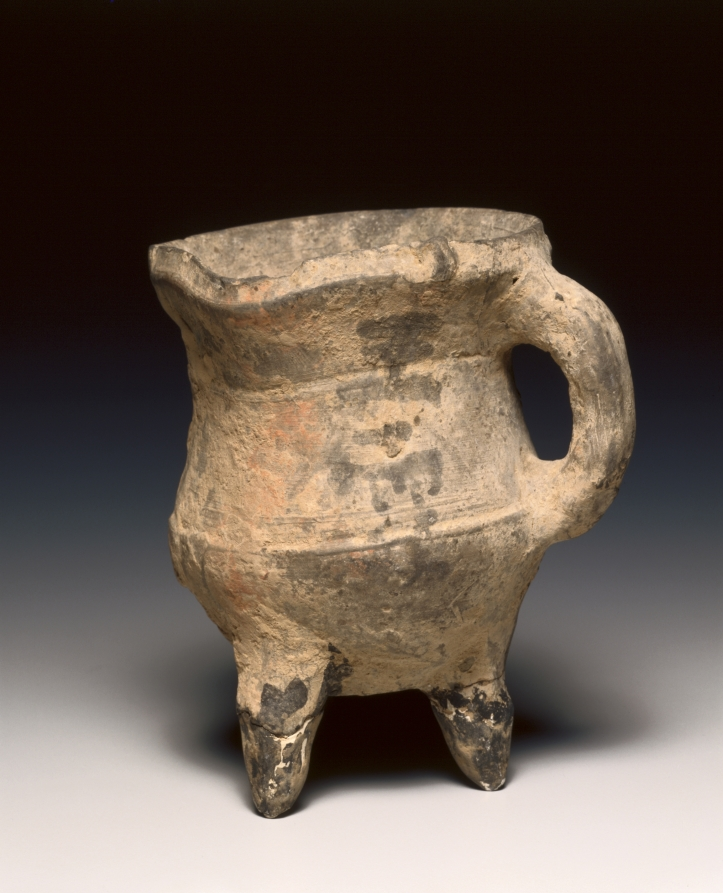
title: Wine Warmer (Jue)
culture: China, Shang dynasty (c. 1600–c. 1046 BCE), Anyang phase (c. 1250–1046 BCE)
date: c. 1300–1023 BCE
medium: pottery, tripod vessel with loop handle and rudimentary bowstring decoration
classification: Ceramic